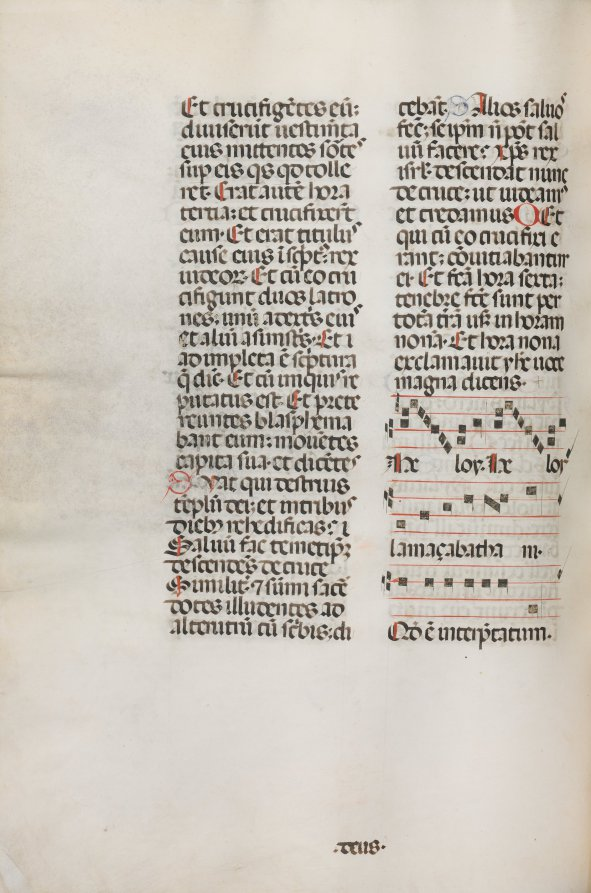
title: Missale: Fol. 128v: contains music for "Hely Hely Lama etc." within St. Mattion Passion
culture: Italy, Perugia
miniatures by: Bartolommeo Caporali (Italian, c. 1420–1503)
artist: assisted by Giapeco Caporali (Italian, d. 1478)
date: 1469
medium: ink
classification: Bound Volume